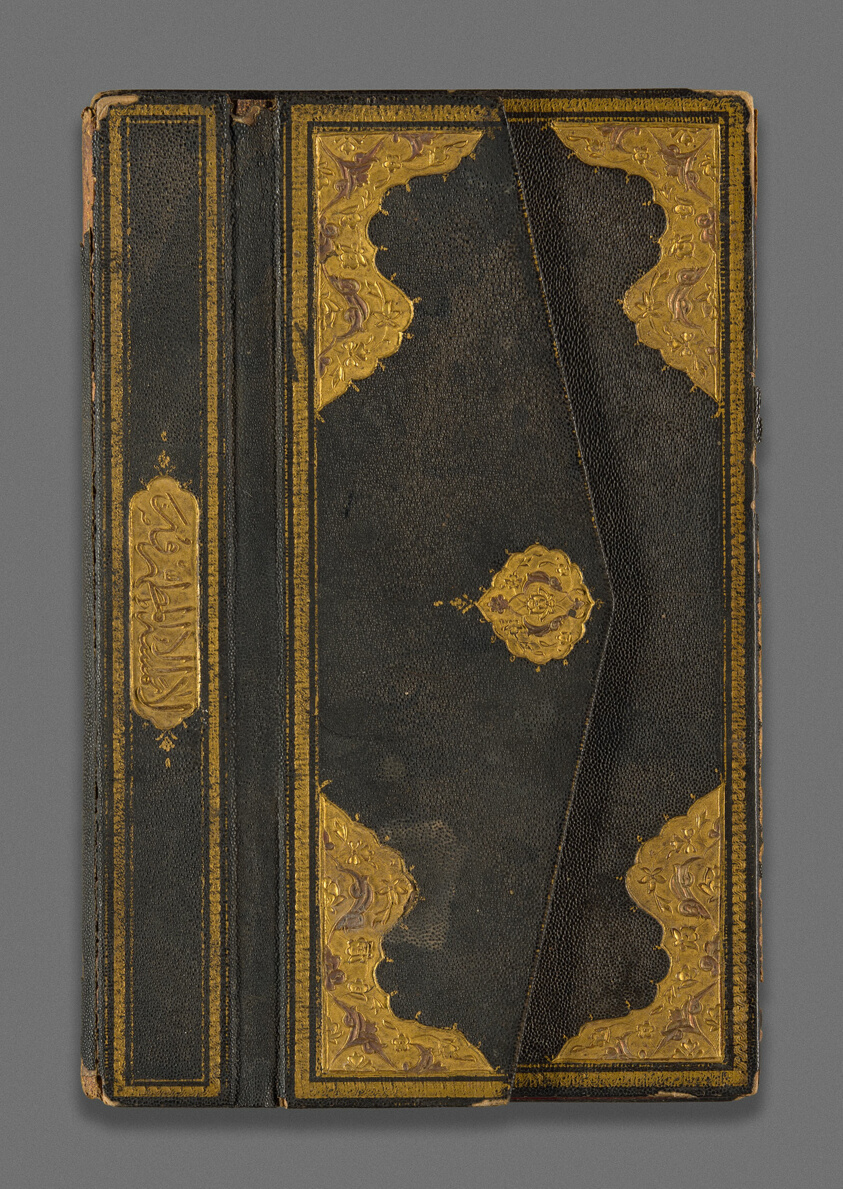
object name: Book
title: Qur'an cover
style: Islamic (culture or style)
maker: Iran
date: 17th century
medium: Leather; exterior: embossed and gilt decoration; interior: filigree and gilt decoration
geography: Iran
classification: manuscript; asian art; book